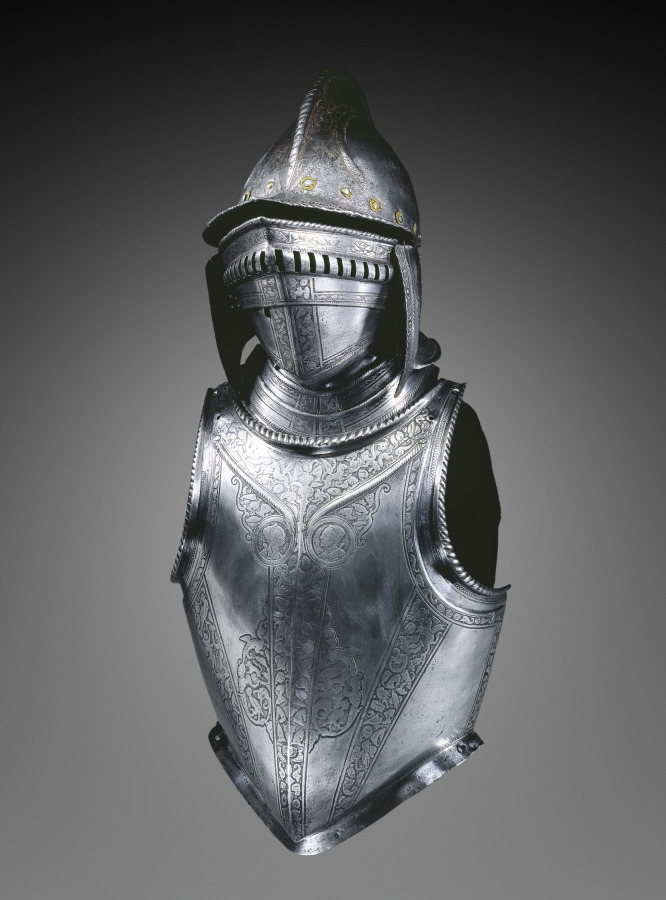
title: Buffe (etched with bands of trophies)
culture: North Italy, 16th century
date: c. 1550–1600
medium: etched steel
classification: Arms and Armor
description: Shown here together is a burgonet, buffe, and breastplate all decorated with a technique known as etching. A burgonet is a light open helmet characterized by a peak, a fall over the eyes, and hinged earpieces. The face is protected by the addition of a buffe, a sperate detachable element worn with the open helmet that extends to the throat. It connects to the breastplate which protects the abdomen and is worn with a backplate.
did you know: Etching is a technique where either the design or its ground is bitten into the metal surface with acid, the rest being protected by a protective wax or varnish.